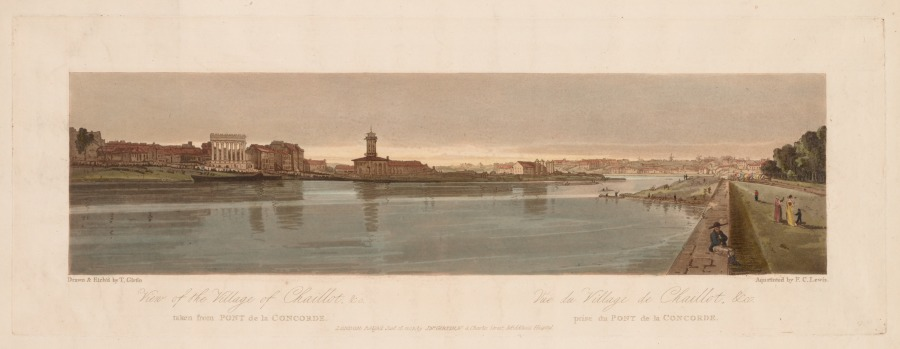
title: A Selection of Twenty of the Most Picturesque Views in Paris: View of the Village of Chaillot, &c Taken from Pont de la Concorde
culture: England, 19th century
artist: Thomas Girtin (British, 1775–1802)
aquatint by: Frederick Christian Lewis (British, 1779–1856)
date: 1803, printed 1810 or after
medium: softground etching and aquatint printed in brown, hand-colored with watercolor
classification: Print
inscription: In plate; Drawn & Etch'd by Thos Girtin; Aquatinted by F. C. Lewis; LONDON: Pubd Jany 16, 1803 by John Girtin, No. I, Little Newport Street, Gerrard Street, Soho.